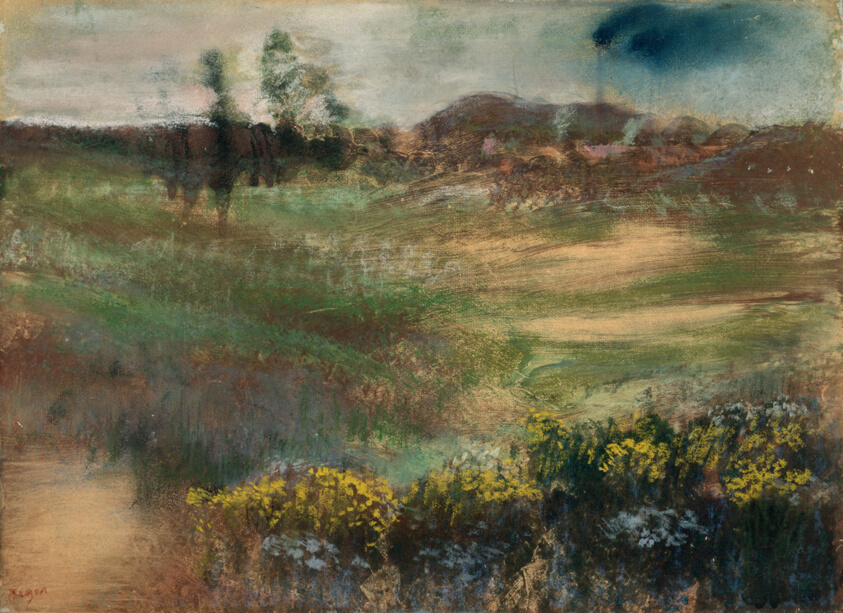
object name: Drawing and Watercolor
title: Landscape with Smokestacks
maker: Edgar Degas; French, 1834-1917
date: c. 1890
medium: Pastel, over monotype, on textured cream wove paper, edge-mounted on board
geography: France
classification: pastel; monotype; drawings (visual works); prints and drawing; paper